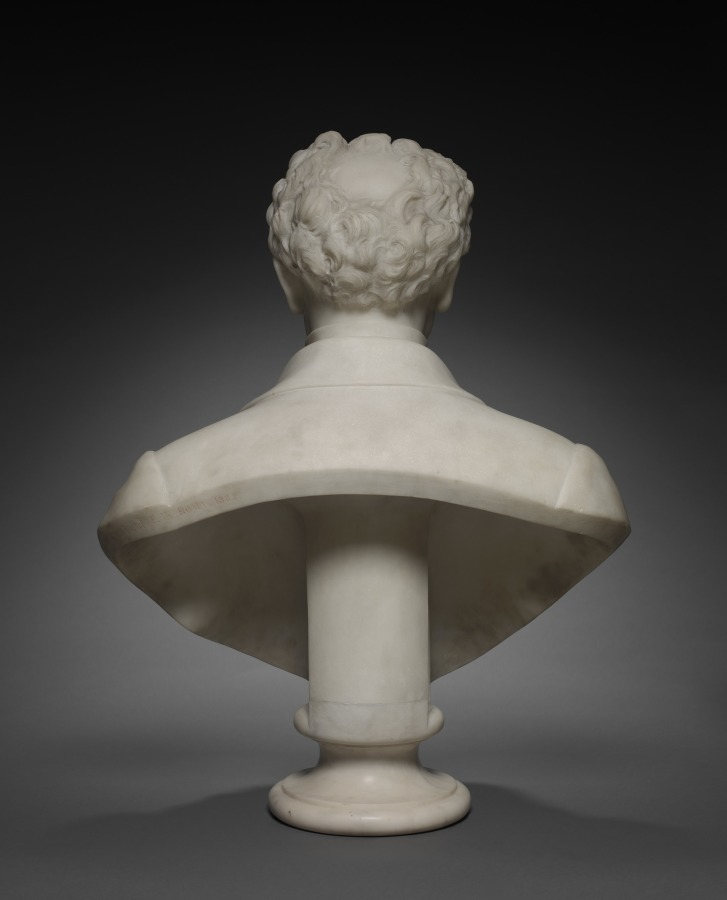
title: Bust of Hinman B. Hurlbut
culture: Italy, Rome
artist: Giovanni Cintselli (Italian, 1832–1883)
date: c. 1870–83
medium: marble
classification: Sculpture